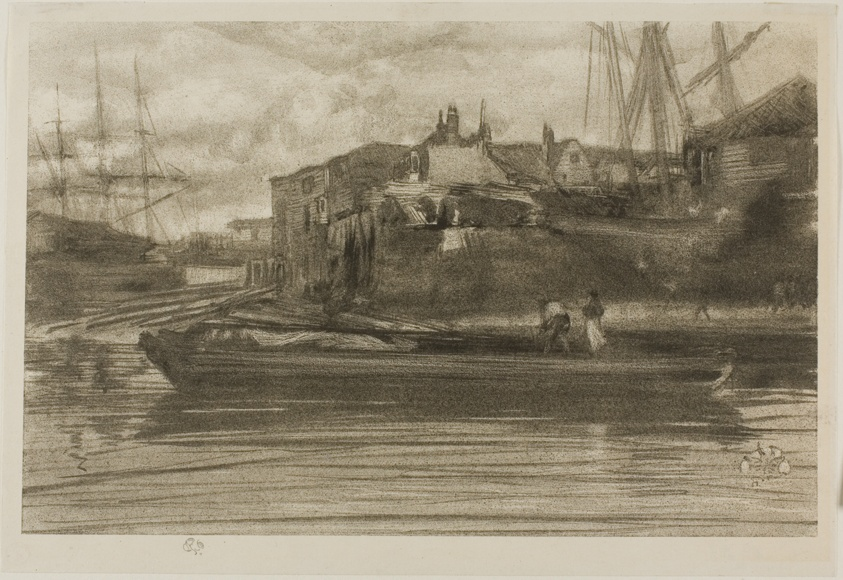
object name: Print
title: Limehouse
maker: James McNeill Whistler (American, 1834-1903)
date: 1878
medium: Lithotint in black ink with scraping and incising, on a prepared half-tint ground, on cream Japanese paper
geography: United States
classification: lithotint; lithograph; print; prints and drawing; paper